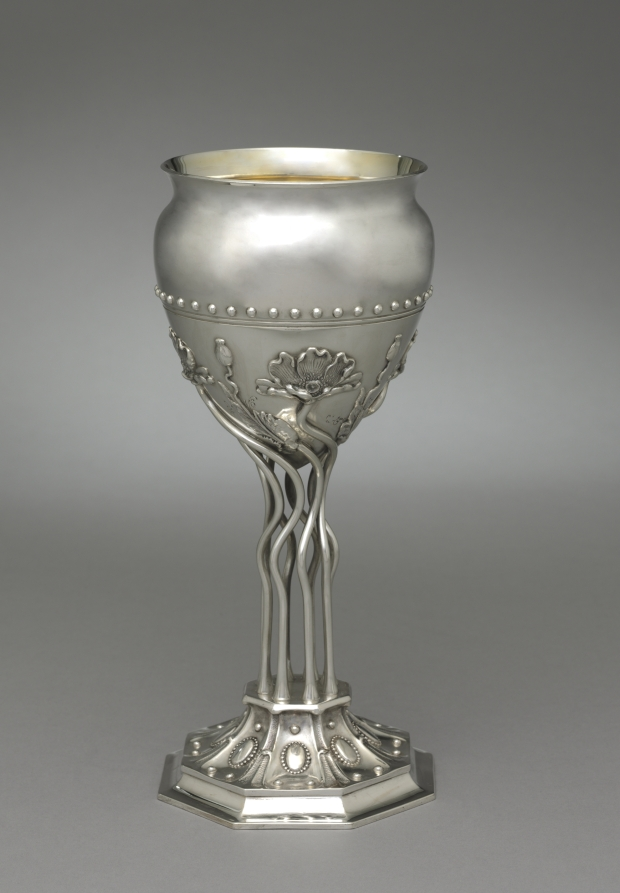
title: Vase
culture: America, New York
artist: firm of Theodore B. Starr (American, 1837–1907)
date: c. 1900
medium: silver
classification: Silver